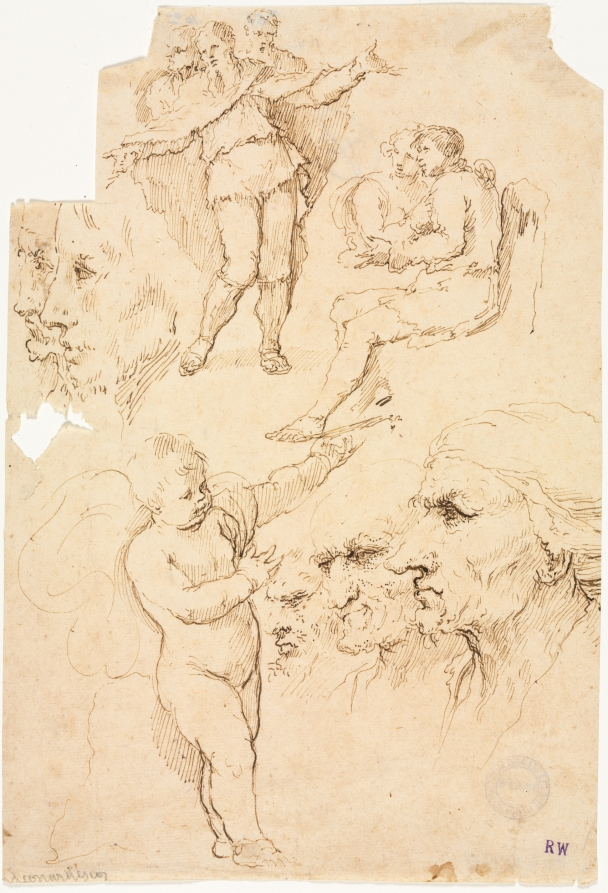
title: Sketches of Heads and Figures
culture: Italy, Naples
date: 1600s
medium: pen and brown ink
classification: Drawing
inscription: lower left, in graphite: Leonardesc[q?] ; VERSO, upper right, in blue pencil: #51 ; upper right, in blue pencil: 10ºº ; upper center, in black ink: D. 720 ; upper center, in graphite: 84 [circled, crossed out in blue pencil) ; lower right, in graphite: F.